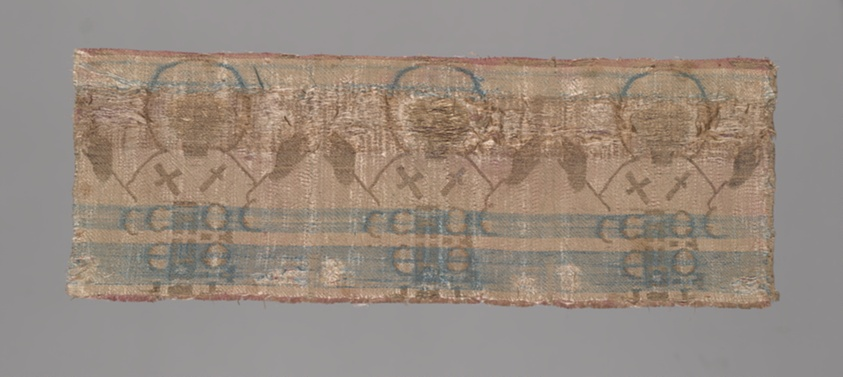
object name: Textile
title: Fragment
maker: Armenia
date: 16th century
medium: Silk and gilt-metal-strip-wrapped silk, warp-float faced satin weave with weft-float faced twill interlacings of secondary binding warp and supplementary patterning wefts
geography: Armenia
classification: textile; weaving